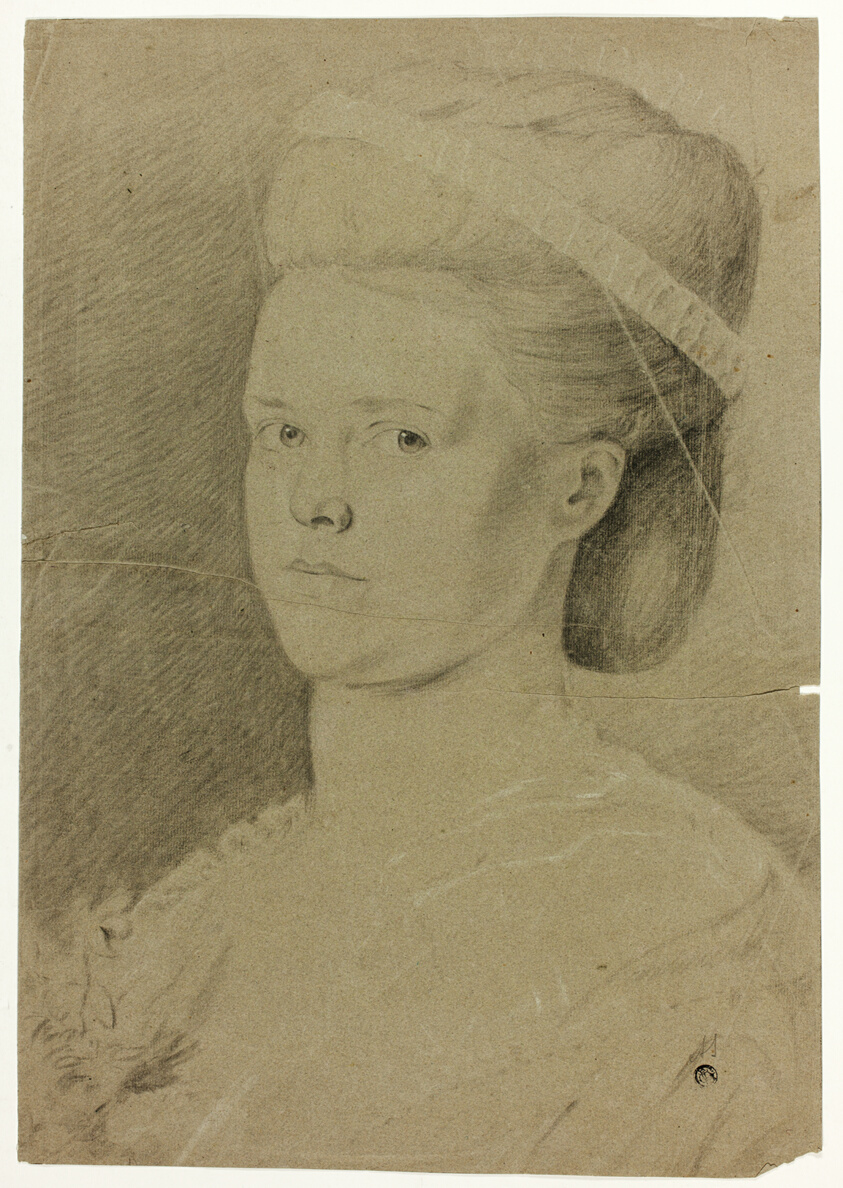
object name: Drawing and Watercolor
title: Portrait Bust of Young Woman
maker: Frances Cotes; English, 1726-1770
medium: Charcoal with stumping, heightened with white chalk, on greenish-gray laid paper with blue fibers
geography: England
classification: chalk; paper; drawings (visual works); prints and drawing